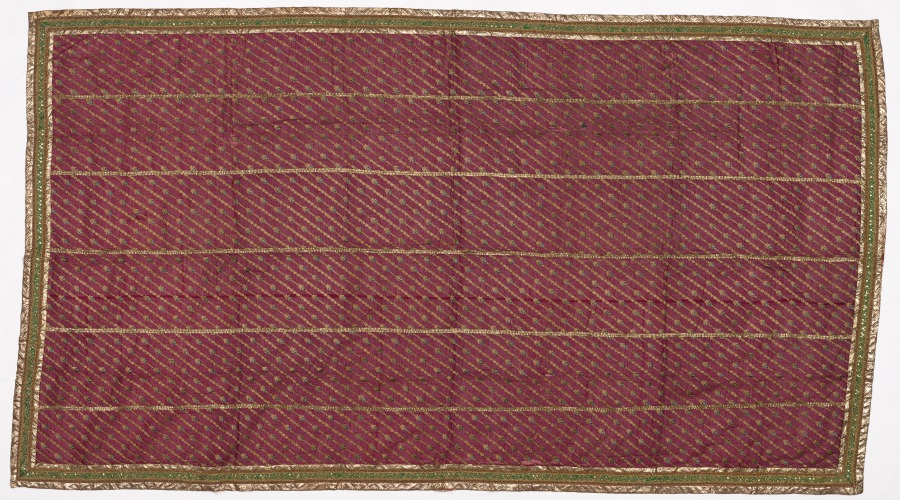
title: Sari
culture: India, 19th - early 20th century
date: 1800s - early 1900s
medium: tabby ground, brocaded and embroidered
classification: Textile